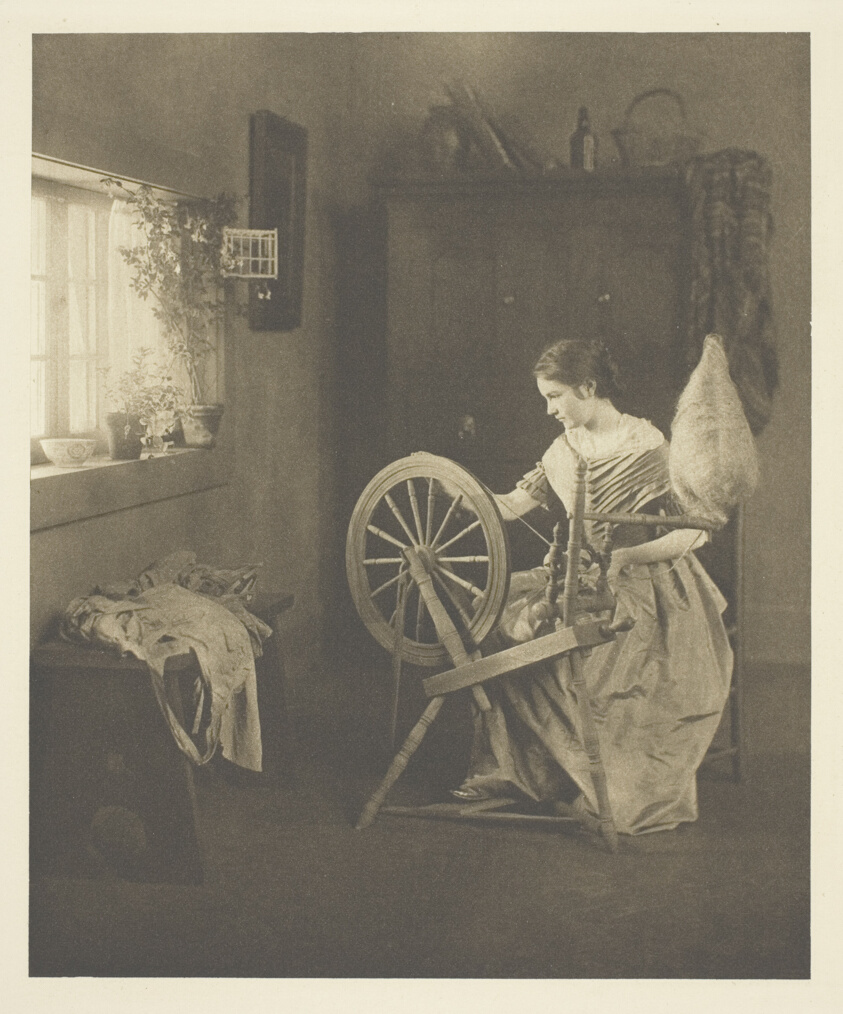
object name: Photograph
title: Spinning, No. 18 from the portfolio "American Pictorial Photography, Series II” (1901)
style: 19th century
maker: Emilie V. Clarkson (American, 1863–1946)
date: c. 1898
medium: Photogravure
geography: United States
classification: photogravure; photomechanical process; photography; photograph